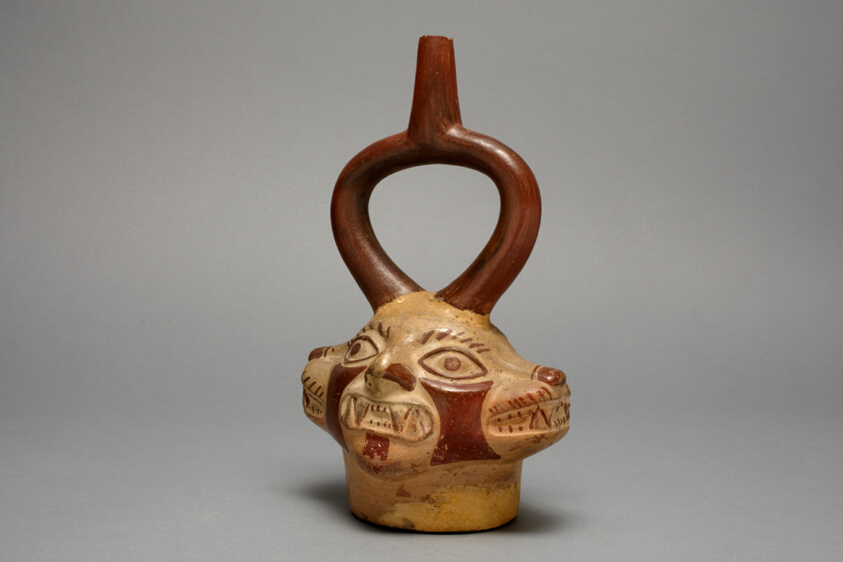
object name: Vessel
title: Stirrup Vessel in the Form of Multi-Headed Feline Being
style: moche, andes, Arts of the Americas, south american, andean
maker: Moche (Chimbote, Santa Valley, north coast, Peru)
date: 250–500 CE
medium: Ceramic and pigment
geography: Santa Valley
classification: earthenware; ceramics; vessel; art of the americas